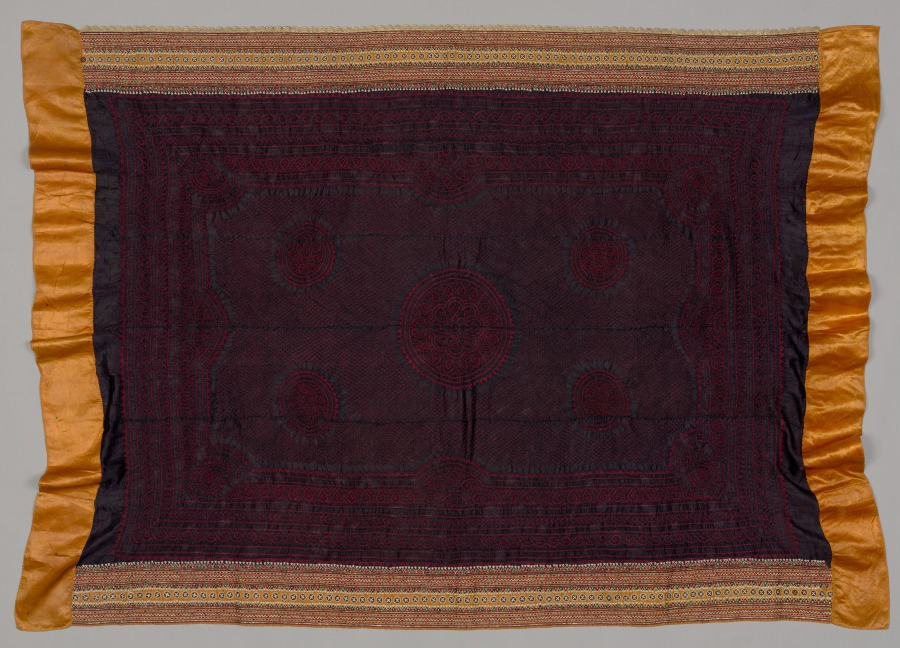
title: Odhani or Bandhani (Veil worn over Head)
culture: Western India, Gujarat, Kachchh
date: early 1900s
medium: silk, tie-dyed (but not ironed flat) and embroidered with polychrome silk and flat strips of silver plaited with silk thread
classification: Textile